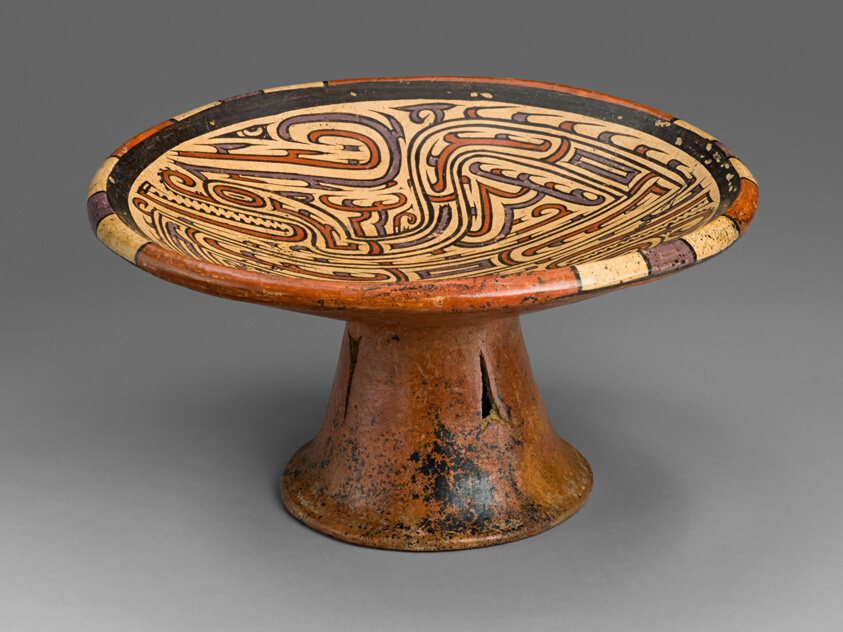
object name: Vessel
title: Pedestal Bowl Depicting Bicephalic Footed Serpent with Headcrest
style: coclé, Pre-Columbian, americas, lower central america, Arts of the Americas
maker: Coclé (Possibly Los Santos province, Panama)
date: 700–1100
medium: Ceramic and pigment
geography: Los Santos province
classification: vessel; earthenware; bowl; ceramics; art of the americas; vessel for serving food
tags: serpents, animals, abstract figures, composite, iguana